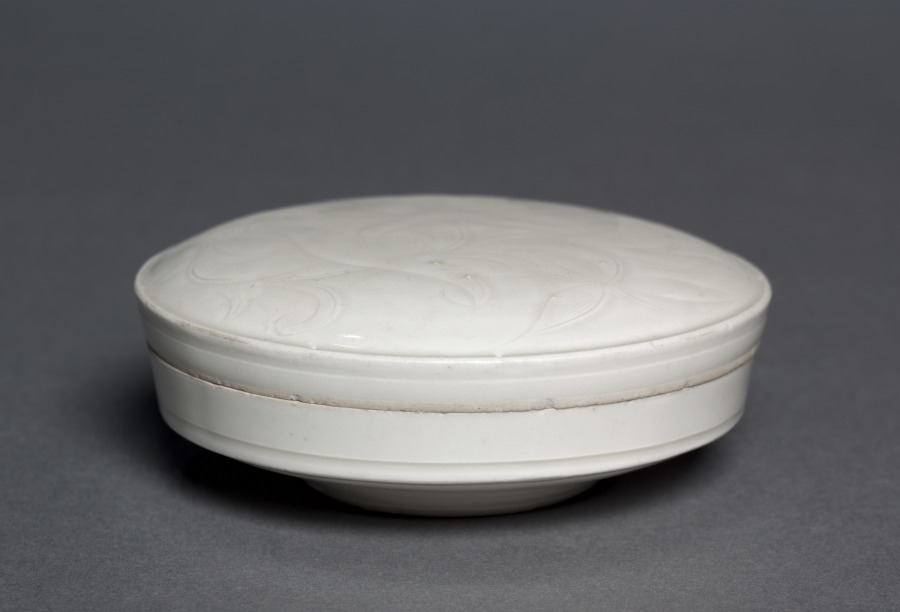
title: Covered Box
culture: China, Hebei province, Quyang, Northern Song dynasty (960-1127) to Jin dynasty (1115-1234)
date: 1100s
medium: cream-glazed porcelain with incised decoration, Ding ware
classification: Ceramic